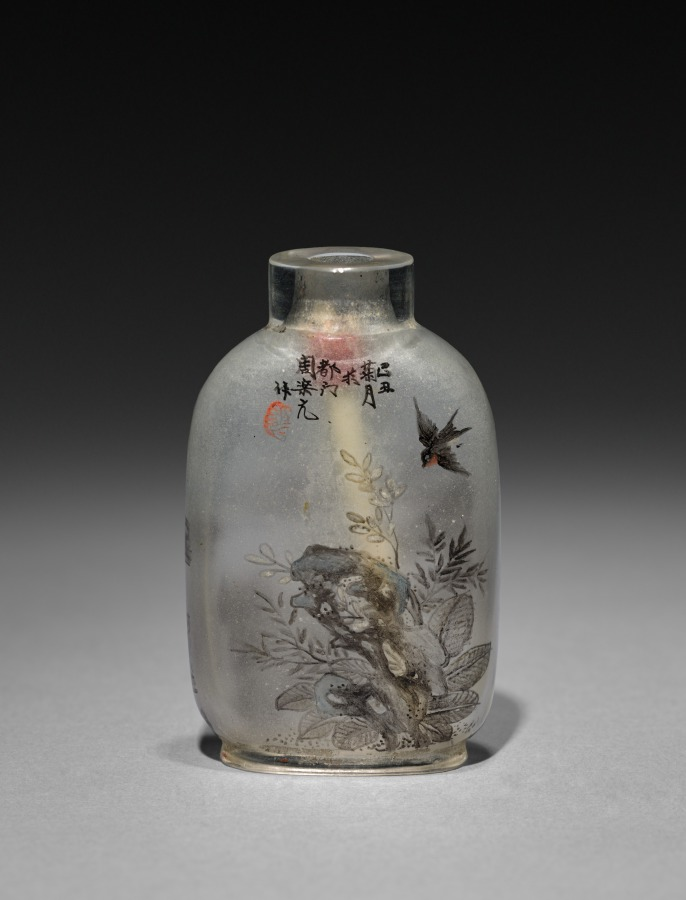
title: Snuff Bottle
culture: China, Qing dynasty (1644-1911)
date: 1644–1911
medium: glass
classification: Glass